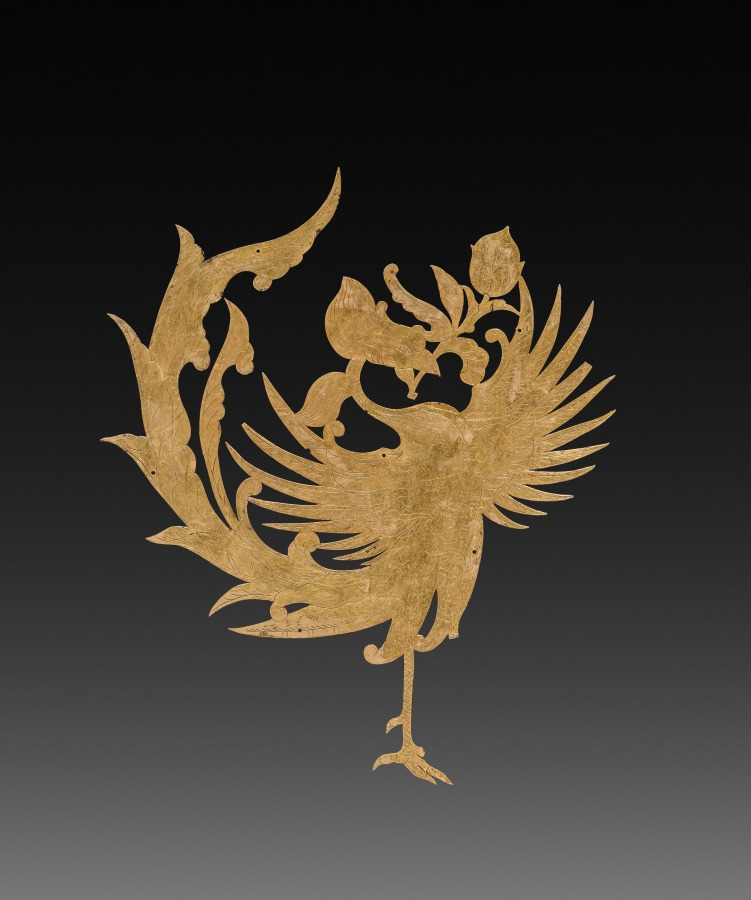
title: Textile Ornament(?): Phoenix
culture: China, Tang dynasty (618-907)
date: c. 700s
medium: beaten gold with chased detail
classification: Metalwork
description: This phoenix bird made of thin gold foil has tiny holes all along its edges, suggesting that it was sewn onto a textile.